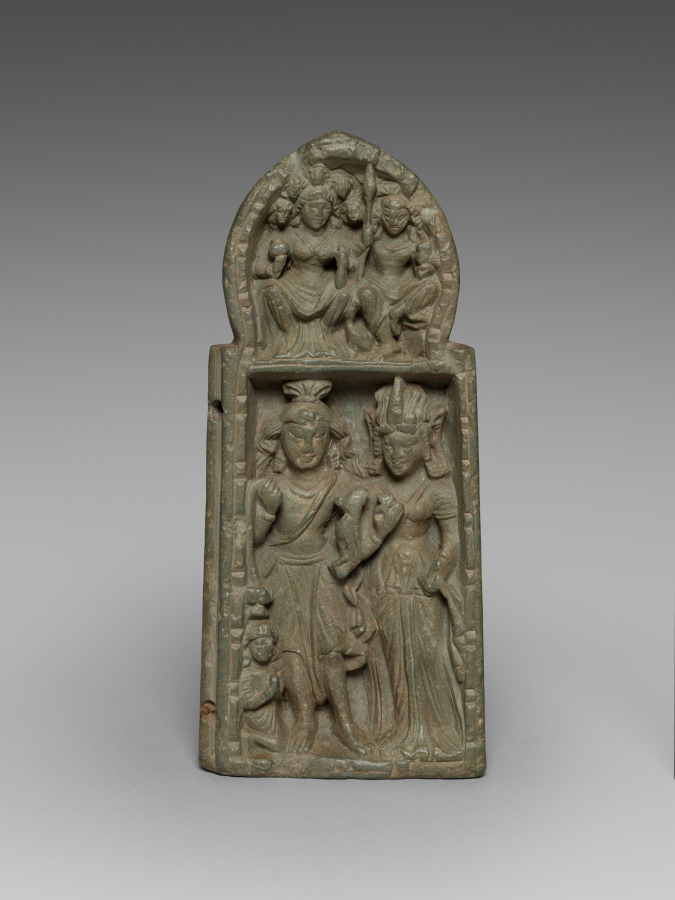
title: Section from a Portable Shrine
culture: Pakistan, Gandhara, Kushan period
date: 100s CE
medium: gray schist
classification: Sculpture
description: Figures of deities who protect children are featured in this relief carving. A form of Skanda holding a bird and a flower stands next to a regal yakshi with pointed rodent or elephant ears. A diminutive figure who may be a child is shown kneeling at his feet. Above, the six-headed mother goddess Shashthi sits next to Skanda, holding the spear.